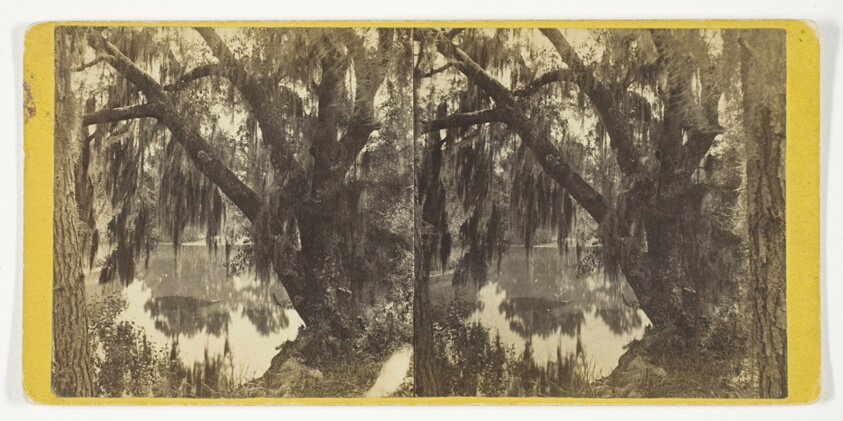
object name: Photograph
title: Unititled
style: 19th century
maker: Artist unknown; American, late 19th century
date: 1875/99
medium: Albumen print, stereo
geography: United States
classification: photography; photograph